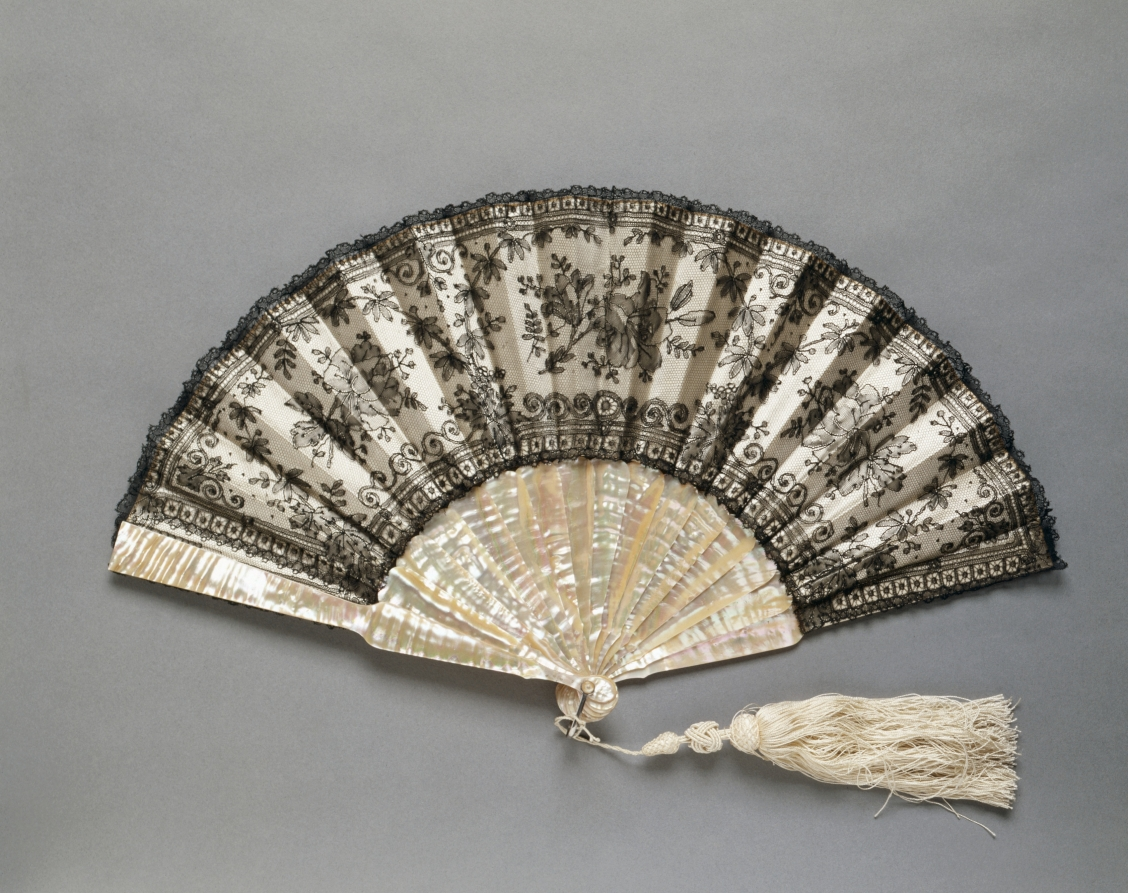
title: Folding Fan: Chantilly Lace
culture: France(?)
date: c. 1870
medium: black "Chantilly" lace over silk lining, white silk tassel; frame: mother-of-pearl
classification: Miscellaneous